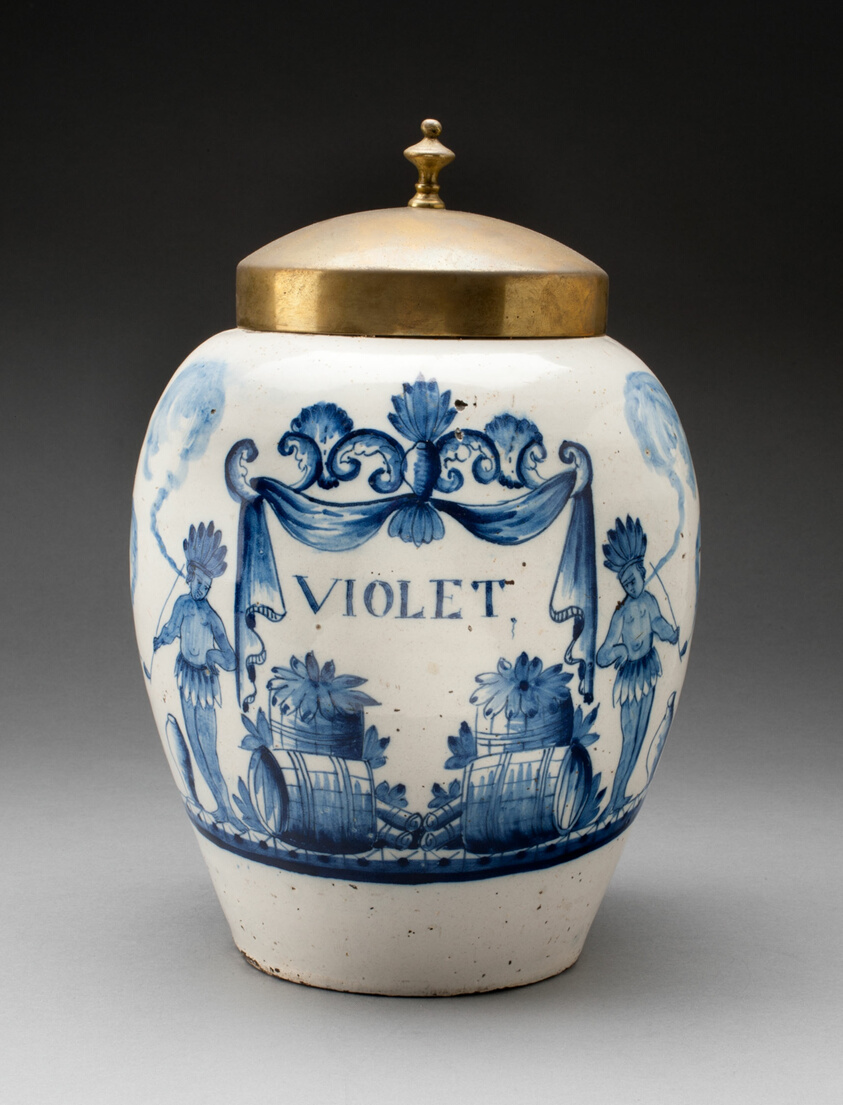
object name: Ceramics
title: Tobacco Jar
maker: Delft, Netherlands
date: c. 1800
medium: Tin-glazed earthenware (Delftware) and brass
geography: Delft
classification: earthenware; ceramics; european decorative arts